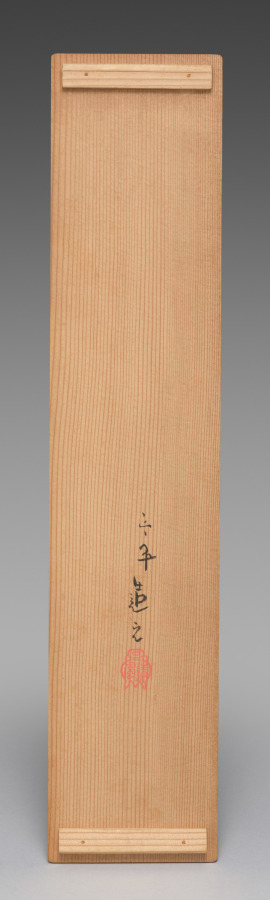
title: Teacups with a Hundred Sages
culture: Japan, Meiji period (1868–1912)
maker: Seifū Yohei III (Japanese, 1851–1914)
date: 1893–1914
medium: Set of five teacups; porcelain with underglaze blue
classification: Ceramic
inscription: 清風造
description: Each of these five teacups has a painting of identical design in underglaze blue, but as the tiny figures are drawn entirely by hand, each cup has its own personality. The theme of the sencha cups is an assembly of sages or immortals, literally “a hundred venerable [people]” (hyakurō). The myriad figures crowd the scene in groups. The god of longevity, with his tall forehead, sits with his cranes, having flown in from Mt. Penglai on the Isle of the Immortals. Seven long-bearded sages sit around a stone table, chatting and drinking; one is seated on an enormous gourd. Of course, there is a stack of books on the table, and elsewhere, scrolls are being written upon or read—in one case held very close by a sage who is wearing glasses. The design was enormously popular in ceramics made for those engaged in literati culture.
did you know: Seifū Yohei III (1851–1914) produced many works for tea gatherings where people drank Chinese-style leaf-tea (sencha).